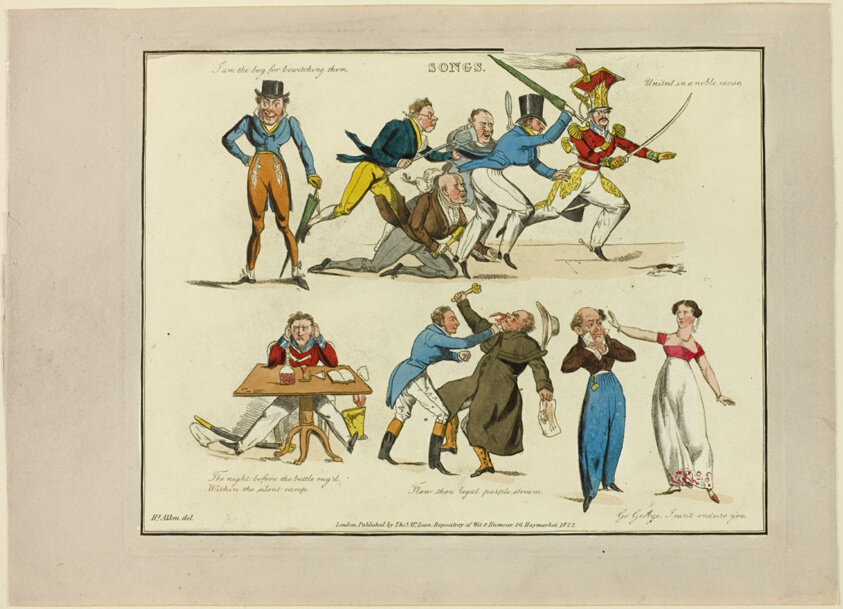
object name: Print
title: Plate from Illustrations to Popular Songs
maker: Henry Alken (English, 1785-1851); published by Thomas McLean (English, active 1790-1860)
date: 1822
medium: Soft ground etching with hand-coloring and aquatint on paper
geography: England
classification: etching; print; prints and drawing